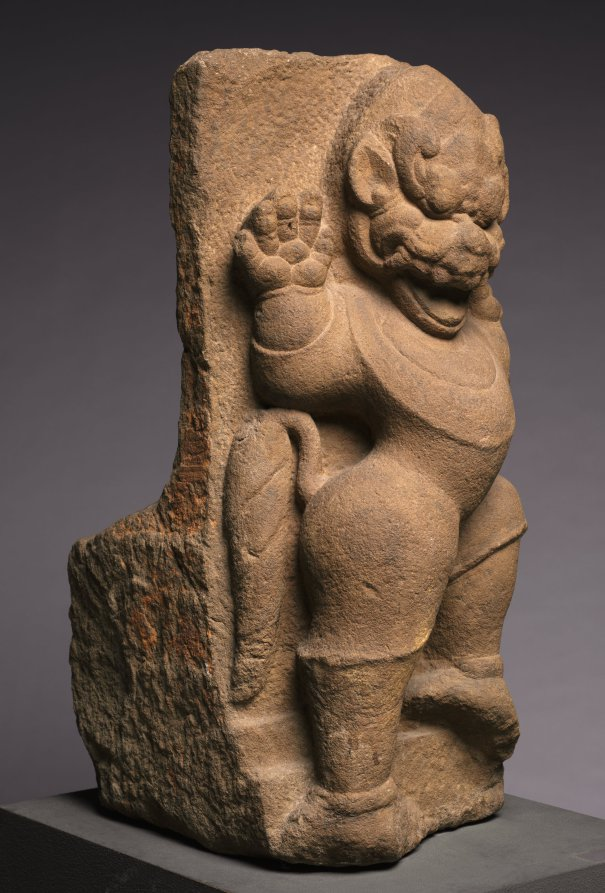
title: Heraldic Lion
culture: Vietnam (Champa)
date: 900s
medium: Beige sandstone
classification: Sculpture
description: The Cham adopted Indian Buddhist and Hindu religious systems, languages, and the practice of building stone temples and monasteries. The lion, which is ubiquitous on Indian monuments, was also incorporated as a protector at Cham sacred sites. In Champa, however, the roaring and rearing lion imagery is semihuman and distinctively aggressive and extroverted. This powerful figure rearing in a combative pose was formerly in the renowned Pan-Asian Collection of Southeast Asian art assembled during the 1960s and 1970s by one major collector, Christian Humann of the renowned Rothschild banking family.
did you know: The Champa kingdom occupied the central and south regions of present-day Vietnam. It was a powerful rival of the Khmer in Cambodia and the Viet of northern Vietnam.